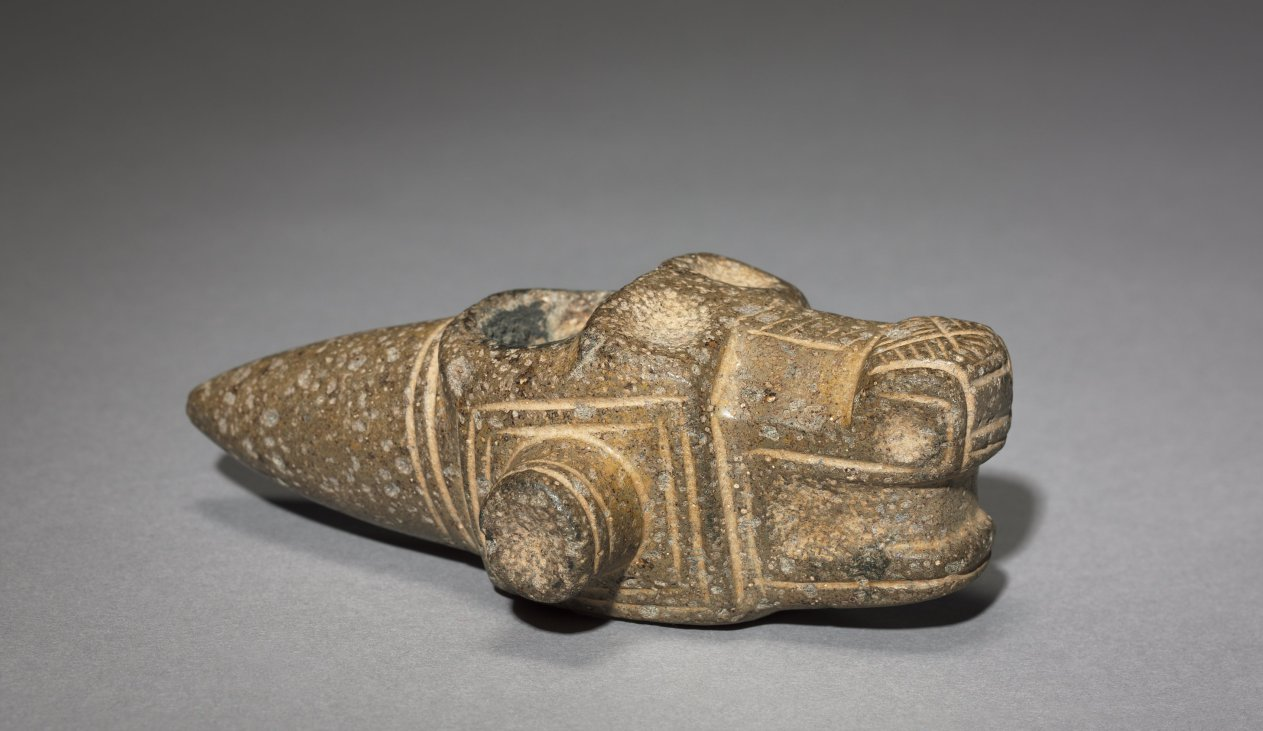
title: Mace Head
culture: Costa Rica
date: 300–500 CE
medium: pecked and polished gray stone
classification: Sculpture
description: Once mounted on wooden shafts, elaborately shaped mace (club) heads like this one probably were not used as weapons. Rather, they could have served as emblems of chiefly authority, group insignia, the heads of ceremonial weapons, or all three. They eventually were placed in elite graves. The back-curled nose on this example may refer to a crocodile or caiman.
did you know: In ancient Costa Rica, it was believed that the world rested on the back of a crocodile.